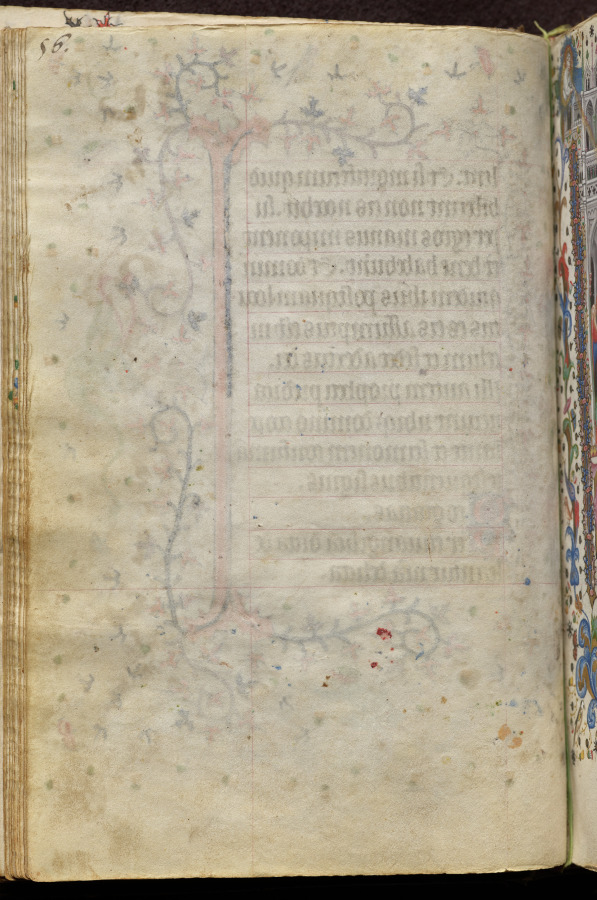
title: Hours of Charles the Noble, King of Navarre (1361-1425): fol. 28v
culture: France, Paris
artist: Master of the Brussels Initials and Associates (French)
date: c. 1405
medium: ink, tempera, and gold on vellum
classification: Bound Volume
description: This precious volume was obviously highly prized by its owner, the French-born King of Navarre, who had his coat of arms painted on no less than twenty folios. Rather than directly commissioning this manuscript from a specific workshop, it seems that Charles the Noble acquired his book of hours -- perhaps ready-made for the luxury market -- while on a trip to Paris in 1404-05. A collaborative effort, six painting styles are evidenced within the pages of this codex, those of two Italians, two Frenchmen, and two Netherlanders. The painter who was responsible for the planning and decoration of the book, and who produced seventeen of the large miniatures, was a Bolognese artist known as the Master of the Brussels Initials. His principal assistant, responsible for most of the borders, was a Florentine who signed his name "Zecho" da Firenze on folio 208 verso.